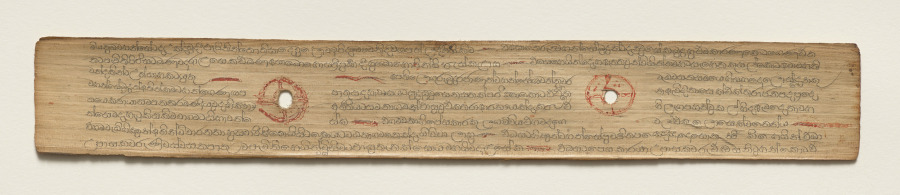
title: Leaf from a Buddhist Manuscript (verso)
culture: Sri Lanka, Singhalese, Late 17th century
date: c. 1700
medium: fiber paper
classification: Manuscript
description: Palm leaf material is still used for manuscripts in Sri Lanka. The palm leaves are prepared first by boiling them, drying them in the sun, and then rubbing them with oils. Scribes then use a metal stylus to incise the text. Then charcoal powder is wiped across the pages, filling in only the inscribed lines.